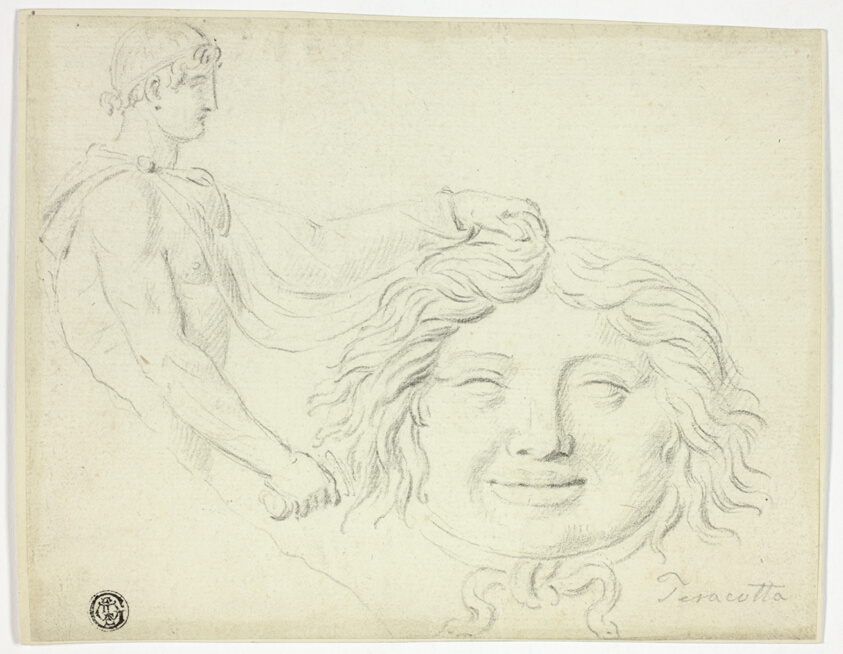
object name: Drawing and Watercolor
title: Perseus and the Gorgon's Head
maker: Style of Jacques Louis David (French, 1748-1825)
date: c. 1770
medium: Black chalk, on ivory laid paper, laid down on ivory wove paper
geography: France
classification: chalk; drawings (visual works); prints and drawing